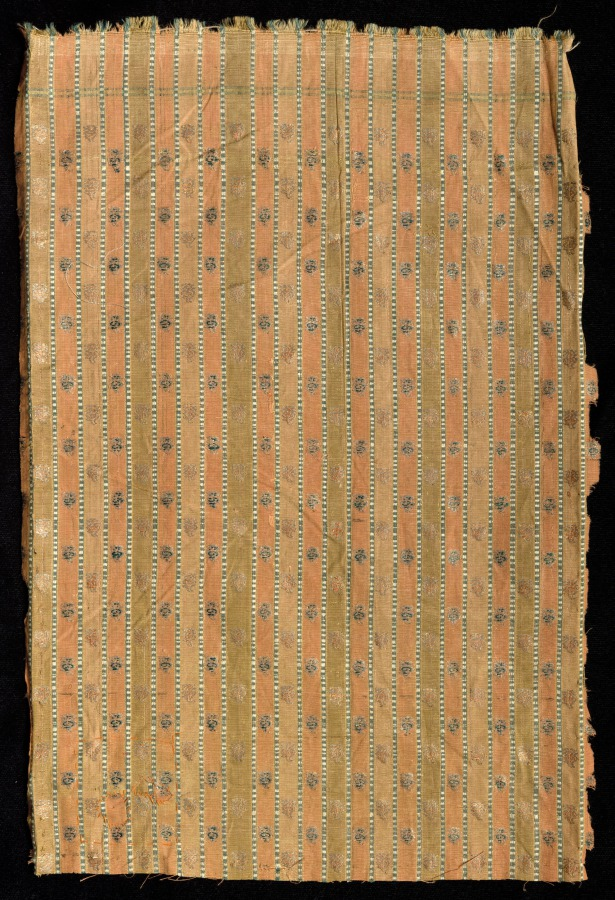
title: Striped Brocade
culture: Southern India, Warangal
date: 1800s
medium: Cotton and silk: brocade, “himru”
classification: Textile